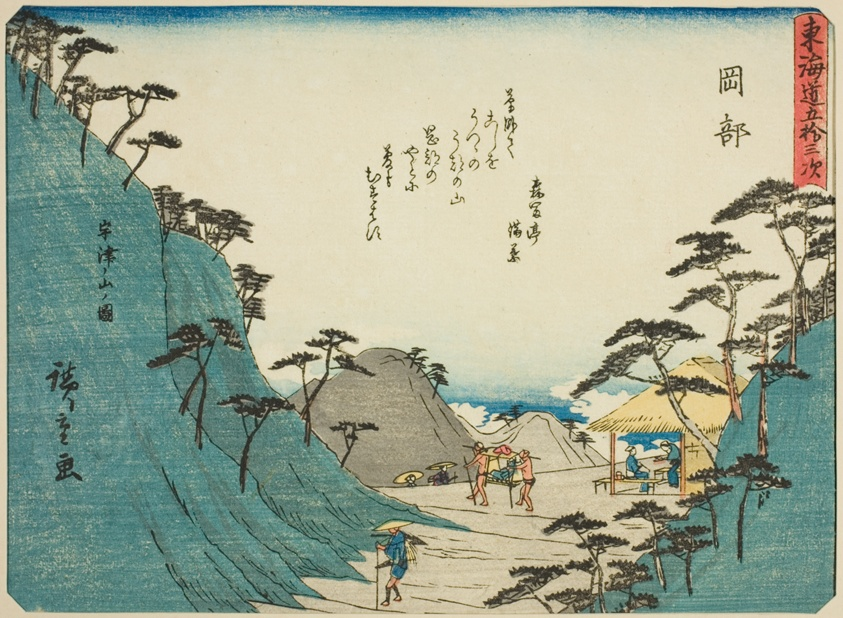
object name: Print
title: Okabe: View of Mount Utsu (Okabe, Utsunoyama no zu), from the series "Fifty-three Stations of the Tokaido (Tokaido gojusan tsugi)," also known as the Tokaido with Poem (Kyoka iri Tokaido)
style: Japanese (culture or style)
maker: Utagawa Hiroshige 歌川 広重; Japanese, 1797-1858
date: c. 1837/42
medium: Color woodblock print; chuban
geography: Japan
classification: woodblock print; print; asian art